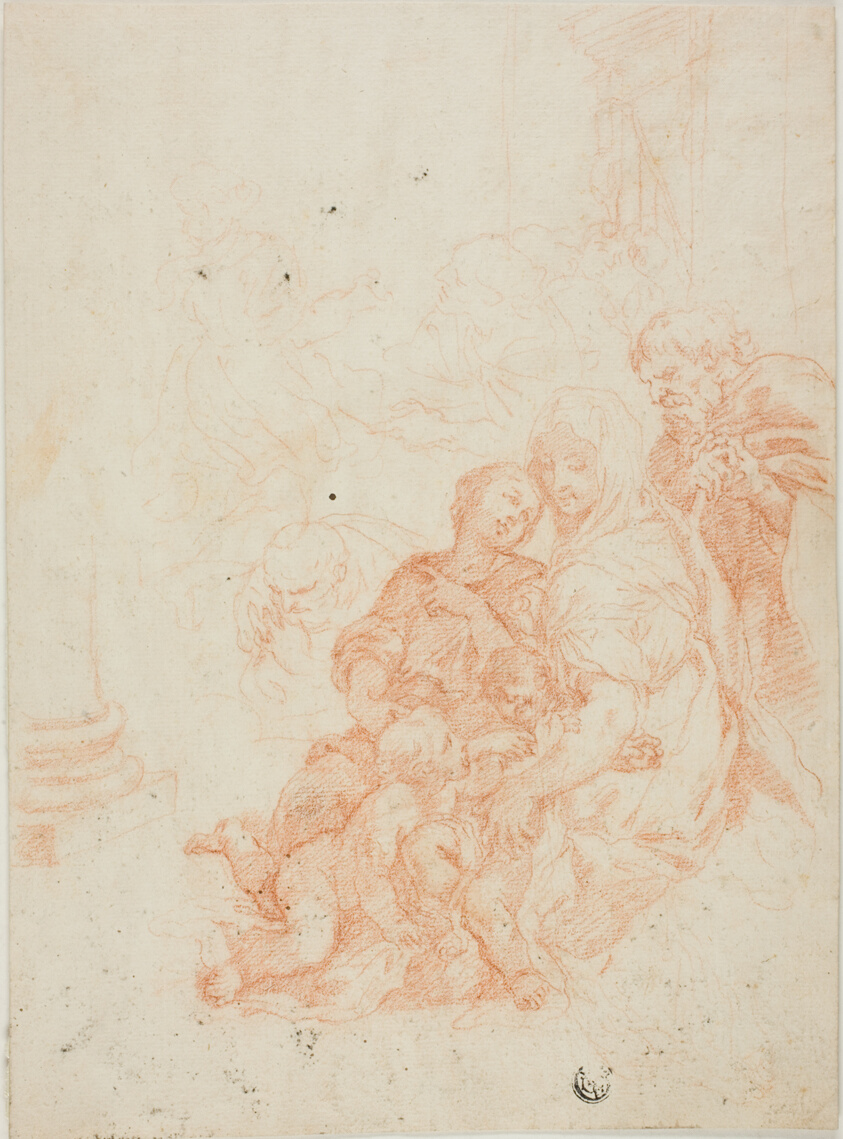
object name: Drawing and Watercolor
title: Holy Family with the Infant Saint John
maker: After Ciro Ferri; Italian, 1634-1689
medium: Red chalk on ivory laid paper, laid down on ivory laid paper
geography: Italy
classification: chalk; drawings (visual works); prints and drawing